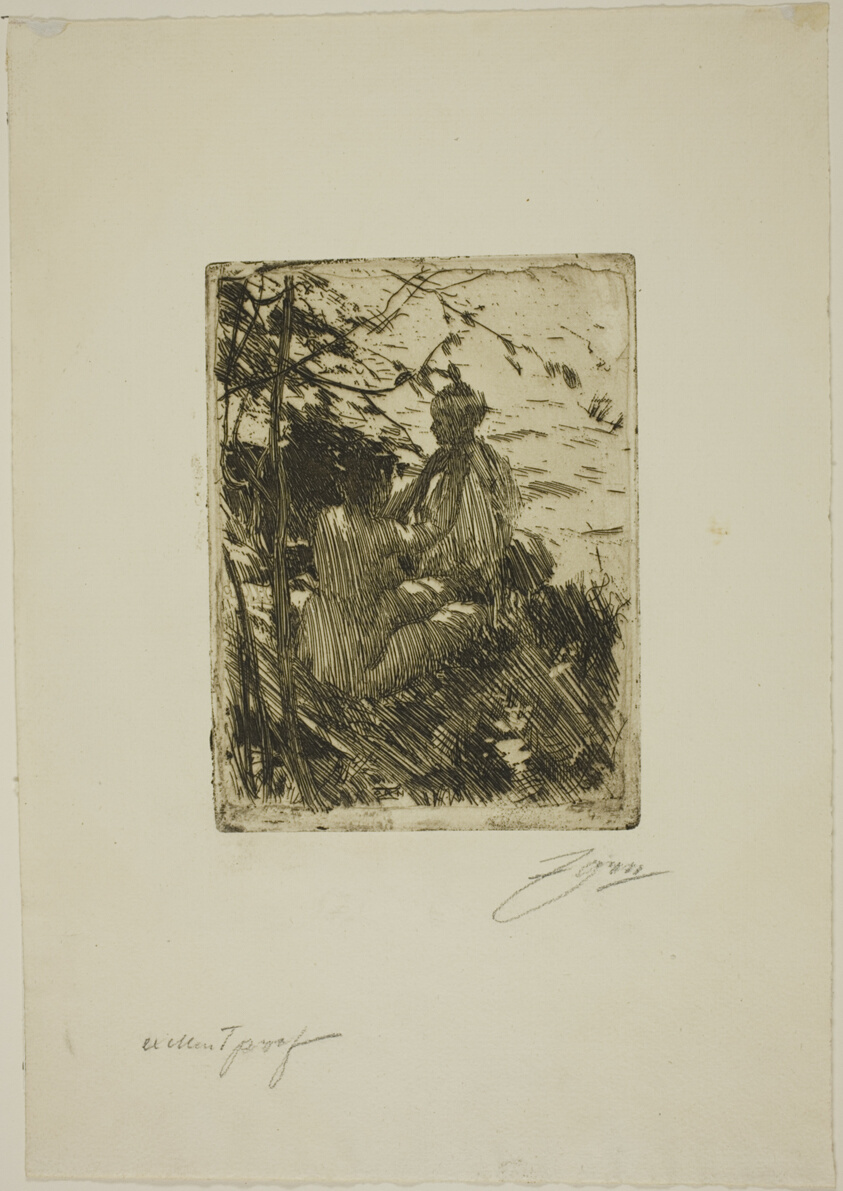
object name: Print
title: In the Open Air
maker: Anders Zorn (Swedish, 1860-1920)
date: 1890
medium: Etching on ivory laid paper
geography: Sweden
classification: etching; print; prints and drawing